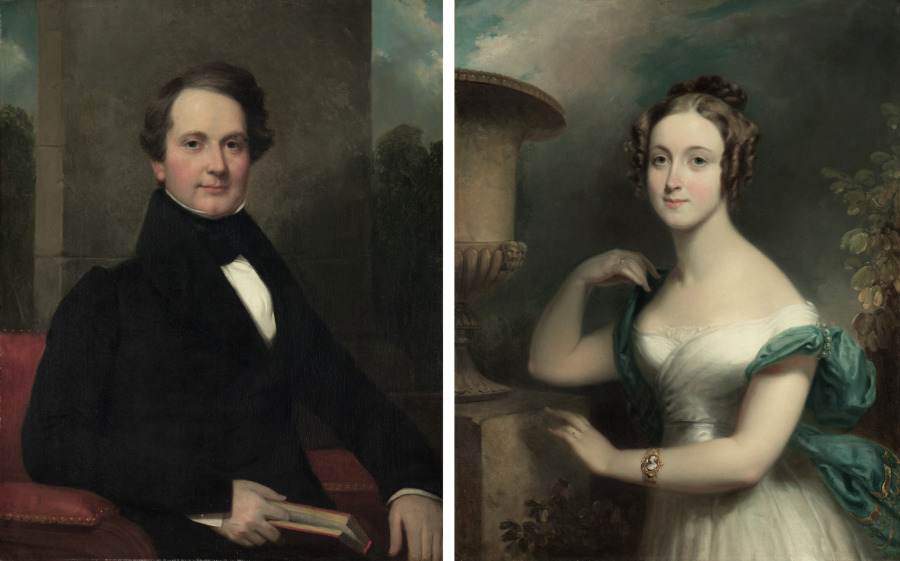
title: Frederic Betts; Mary Ward Betts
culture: America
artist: Henry Inman (American, 1801–1846)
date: 1830s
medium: oil on canvas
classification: Painting